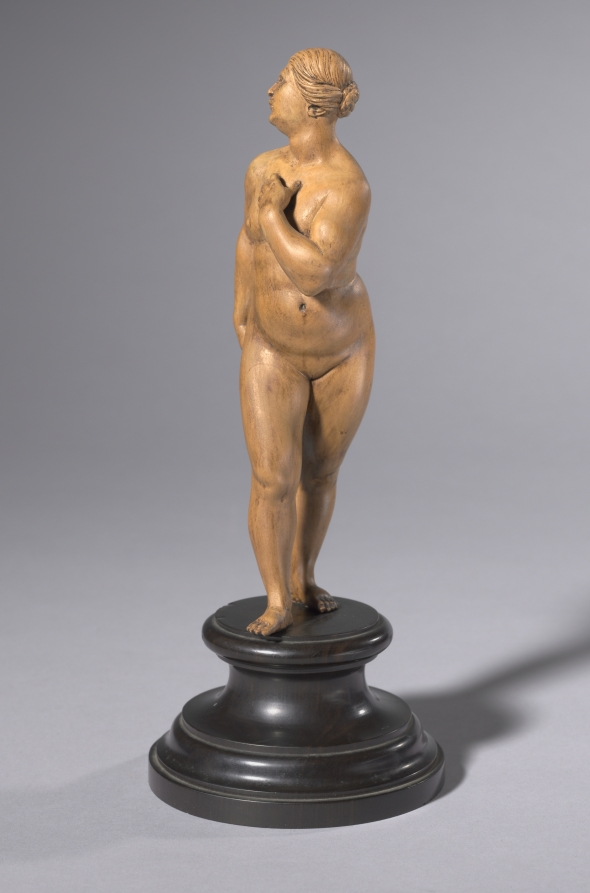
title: Eve Expelled from Paradise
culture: Germany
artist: Leonhard Kern (German, 1588–1662)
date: c. 1640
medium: wood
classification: Sculpture